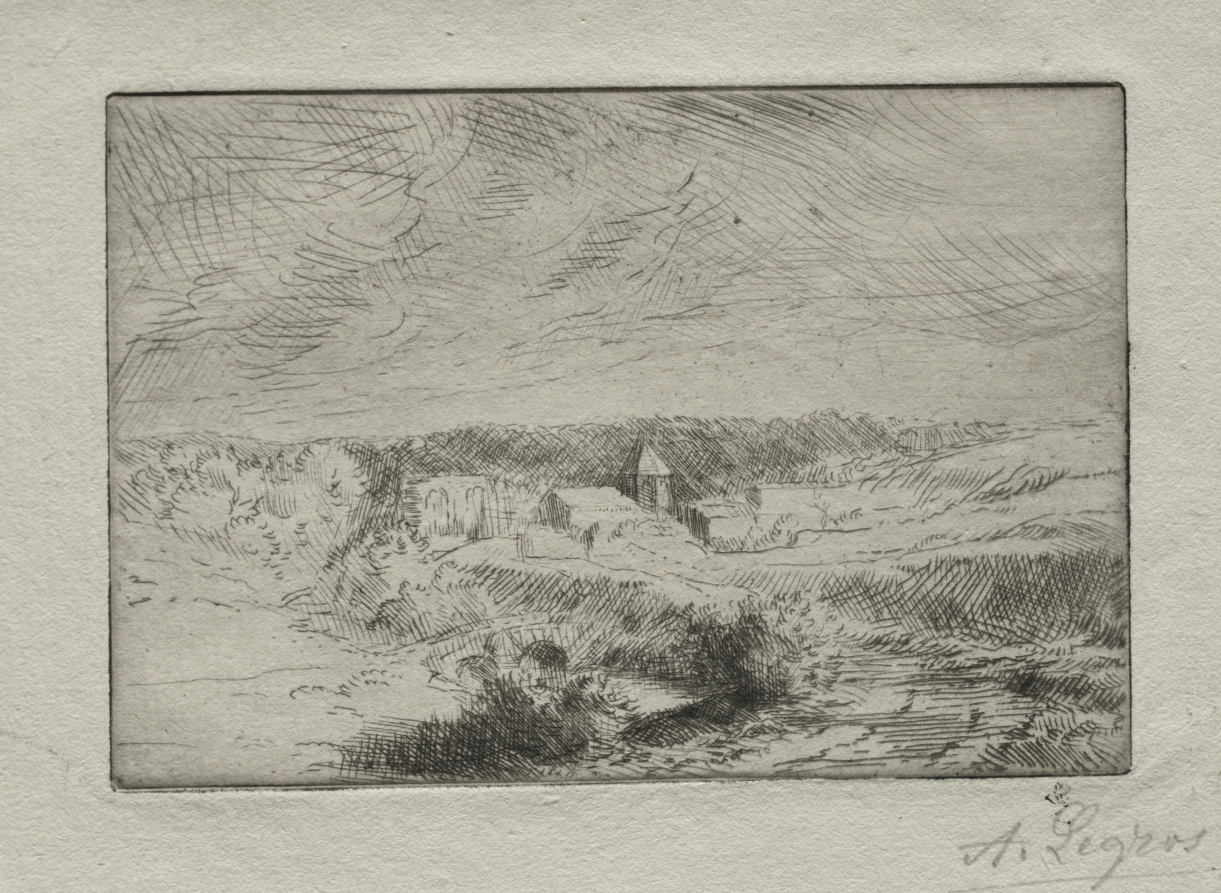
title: Village of Wimille, near Boulogne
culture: France, 19th century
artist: Alphonse Legros (French, 1837–1911)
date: c. 1857–1911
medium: drypoint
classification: Print